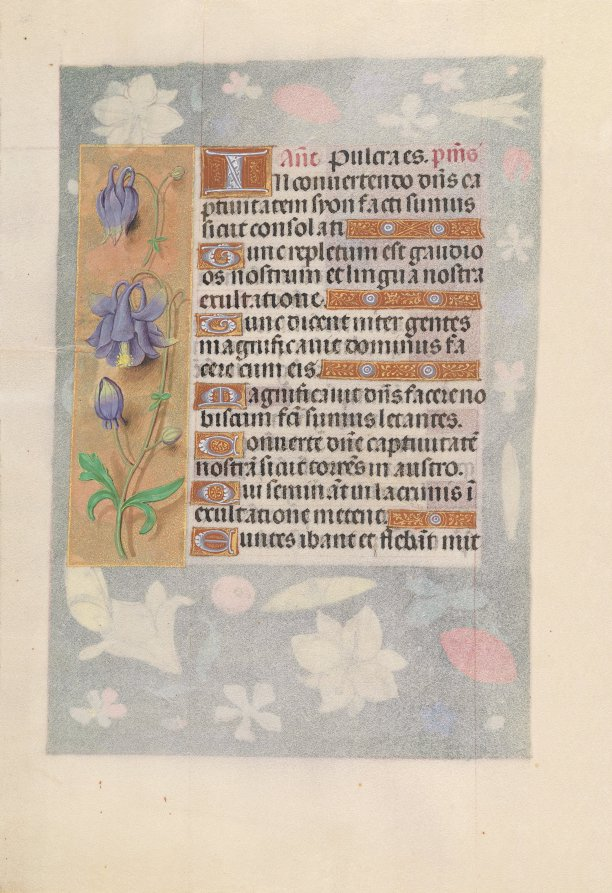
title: Hours of Queen Isabella the Catholic, Queen of Spain: Fol. 142v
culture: Flanders, Ghent and Bruges, late 15th century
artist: Master of the First Prayerbook of Maximillian (Flemish, c. 1444–1519)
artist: and Associates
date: c. 1500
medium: ink, tempera, and gold on vellum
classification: Bound Volume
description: This manuscript was illuminated by a circle of at least five highly organized manuscript painters active in the Flemish cities of Ghent and Bruges. The principal illuminator was Alexander Bening, who painted the majority of the book's miniatures. Manuscripts produced by this circle of artists are renowned for the decoration of their borders, which typically feature a rich variety of realistically-painted flowers, birds, and butterflies. This prayer book, called a book of hours, was intended not for a cleric, but for the private devotions of a lay person-in this case, Isabella the Catholic, Queen of Spain (1451-1504). Isabella's coat of arms embellishes the book's frontispiece. It is unlikely that the book was commissioned by the Queen herself; rather, she probably received it as a diplomatic gift from someone courting her patronage, perhaps Cardinal Francisco Jimenez de Cisneros. A Franciscan friar, Jimenez was dependent upon Isabella for his advancement, first to the post of Queen's confessor in 1492, and then to Archbishop of Toledo in 1495.